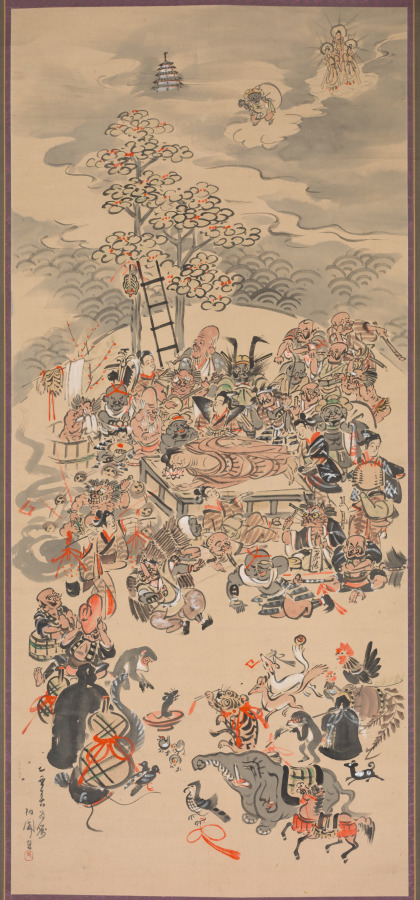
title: Ōtsu-e Nirvana of the Buddha (Ōtsu-e Butsu Nehanzu)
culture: Japan, Meiji period (1868–1912)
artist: Hakuen (Japanese, active 1850–1870)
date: 1800s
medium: hanging scroll, ink and color on paper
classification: Painting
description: The painting parodies the traditional representation of this subject. The death of Buddha is actually the moment he achieves nirvana and escapes the endless cycle of death and rebirth. Hakuen transformed this serious moment (see The Death of the Buddha [1916.1141]) into a lively parody with otsu-e subjects. Mourners surround the Buddha. An oni, who pretends to be a priest, holds his gong in the air as he beats his drums and chants prayers. The wisteria maiden appears at the left, bringing water to the mourners. Behind her is an oni in the guise of a thunder god beating his drums. The animals along the foreground represent other otsu-e characters and models. The painting would have amused 19th-century viewers familiar with the usual Buddhist imagery.